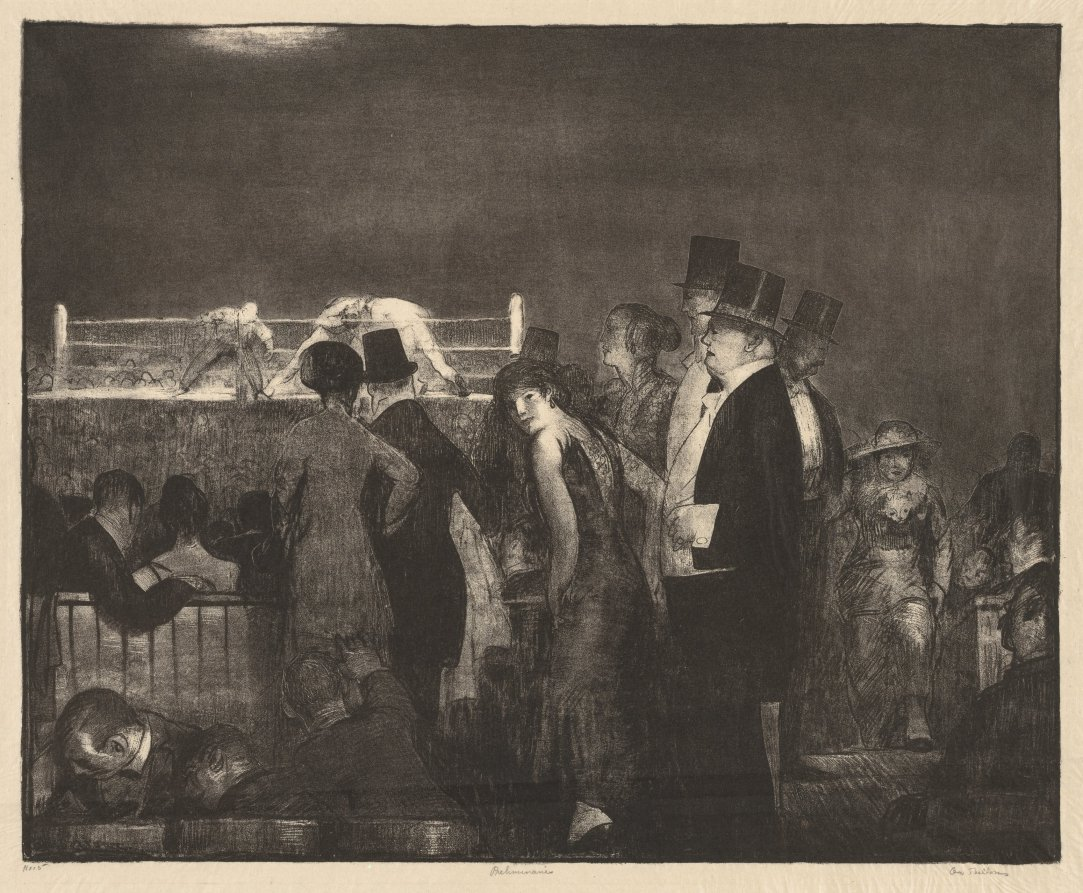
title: Preliminaries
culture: America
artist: George Bellows (American, 1882–1925)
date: 1916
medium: lithograph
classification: Print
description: By 1916, the year Bellows created Preliminaries, boxing was legal in New York and had begun attracting audiences beyond its usual working-class, male demographic. Relegating the ensuing match to the background, this print focuses on a group of wealthy spectators who arrive to take their seats in Madison Square Garden. According to the artist’s widow, the subject was occasioned by the first bout in New York to which women were permitted to attend.